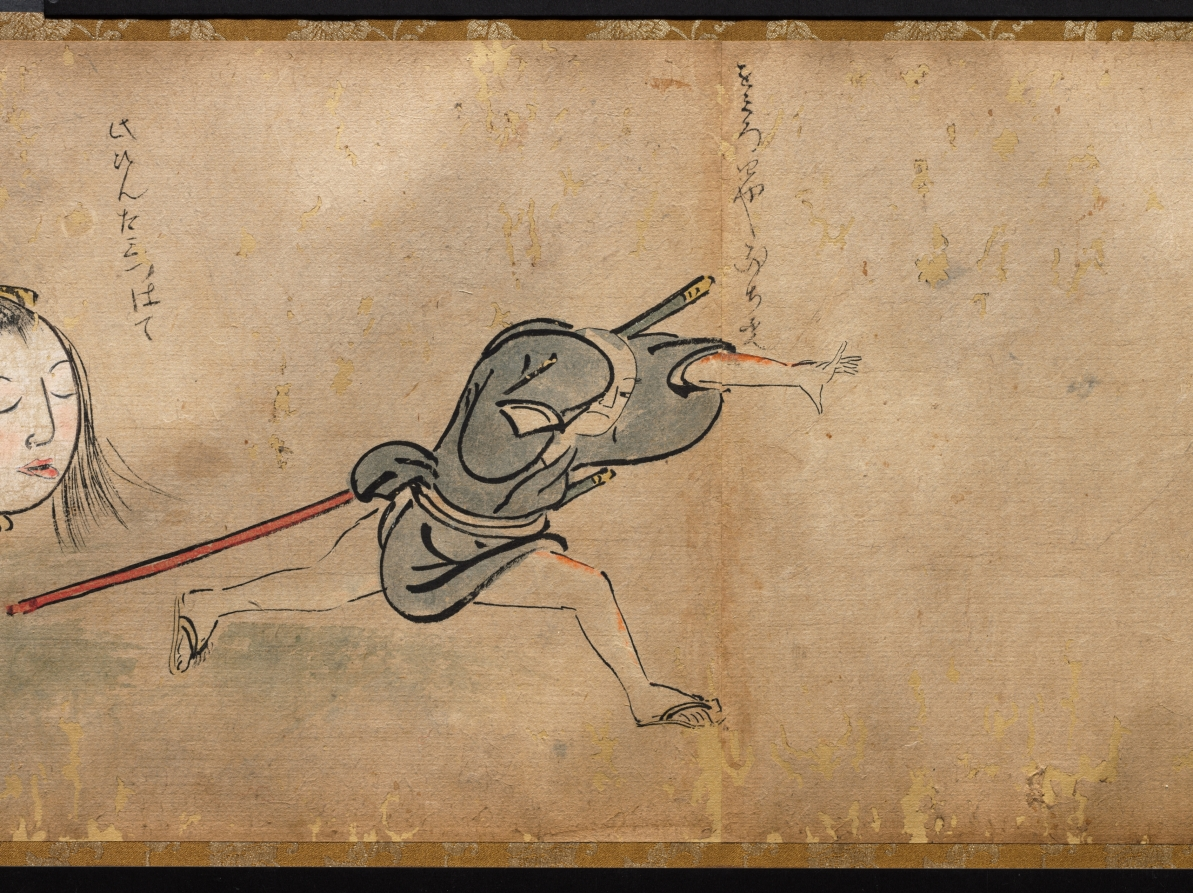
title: The Illustrated Tale of Oishi Hyōroku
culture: Japan, Edo period (1615–1868)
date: 1700s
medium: handscroll; ink and color on paper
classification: Painting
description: This incomplete handscroll illustrates part of the story of Oishi Hyoroku, a young man tasked with battling fox apparitions who were creating problems in his town. In other extant versions of the scroll, the story is set in the fall of 1624 in Kagoshima in southern Japan. Throughout the story, Hyoroku is tricked and terrified by the foxes that shift their shapes into a variety of monstrous phantoms. After repeated humiliations, he eventually captures two of the foxes. In this version, colloquial texts that function like text blurbs in comics appear throughout the scroll, but the main text is missing.